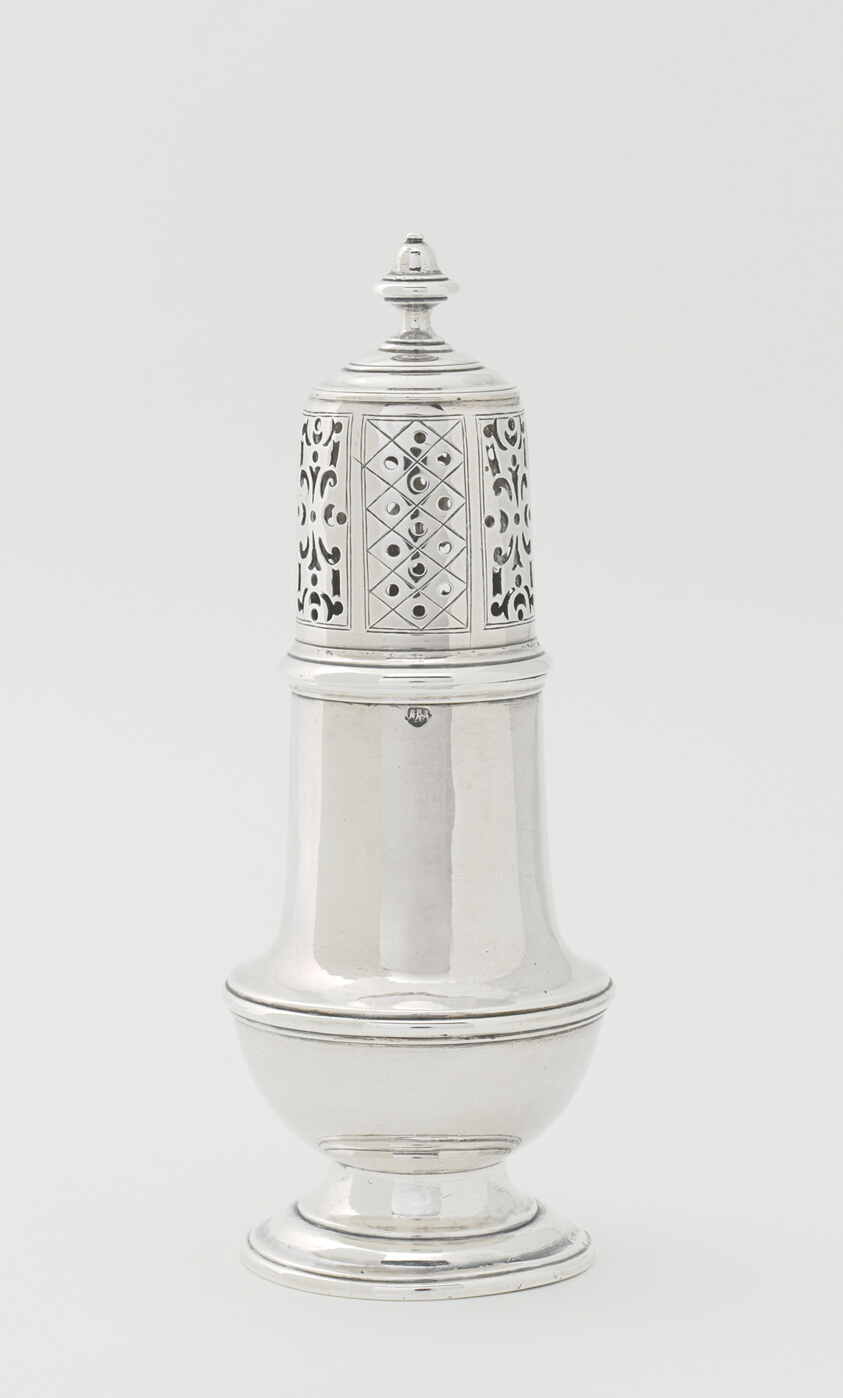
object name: Metalwork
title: Pair of Casters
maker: Attributed to Jacob Hurd; American, 1702/03–1758; Boston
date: 1740–50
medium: Silver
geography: Boston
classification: condiment vessel; silver; american decorative arts; american arts; decorative arts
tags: dining, drinking